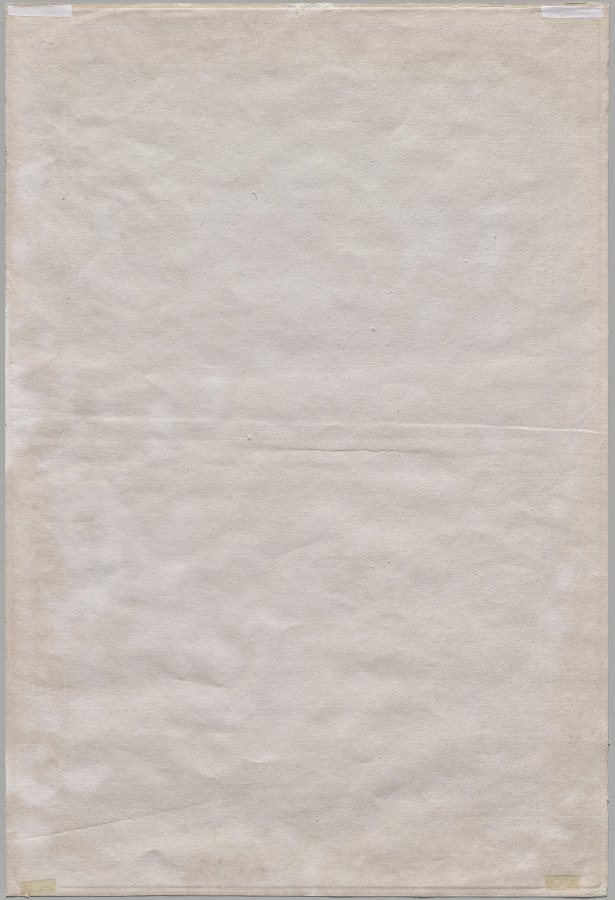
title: Night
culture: Germany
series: Times of Day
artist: Philipp Otto Runge (German, 1777–1810)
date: 1803–5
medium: etching on heavy wove paper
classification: Print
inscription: Written in pencil on mat: "Nacht"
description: Phillip Otto Runge’s large-scale, four-part print series, Tageszeiten (Times of Day), is a landmark of German Romantic printmaking, capturing the “new art” promoted by Runge and his contemporary, Caspar David Friedrich, one rooted in a more personal and spiritual response to nature. Runge presents allegories of nature as a means to understand God and the sublime on earth. His four-part series represents not only the four times of day but also the seasons and the stages of human life, while contrasting eternal time with human time through various literary and religious references. Viewing the series from Morning to Night, seedlings emerge from the earth, bloom, decay, and die. Young spirits or children are born, mature, and grow old, eventually entering a sleep reminiscent of death. A female figure appearing in two scenes, possibly Mother Nature, inspires abundance and then embraces its decline, suggesting nature’s continuity despite human mortality. In each plate, Runge contrasts eternal time with human time, or spirituality with physicality, by contrasting the iconography in the borders with that in the centers.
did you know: After receiving a set of Times of Day as a gift from the artist, the German author Johann Wolfgang von Goethe (1749–1832) apparently exclaimed, “it’s enough to drive you crazy—beautiful, and mad at the same time!”